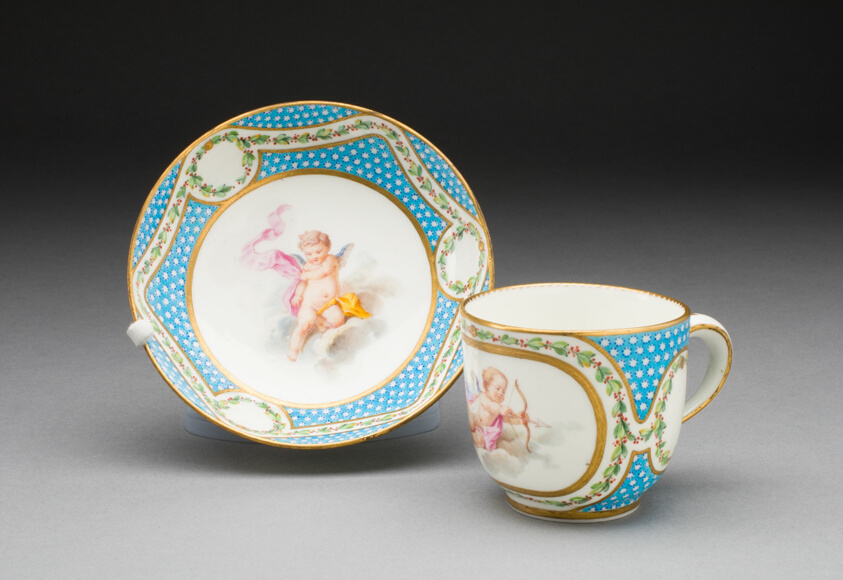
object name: Ceramics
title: Cup and Saucer (from a tea service)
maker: Sèvres Porcelain Manufactory; French, founded 1740; François Boucher (French, 1703-1770); Painted by Jacques Fontaine (French, 1734/35-1807, active 1752-1800)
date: 1770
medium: Soft-paste porcelain, polychrome enamels, and gilding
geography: Sèvres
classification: drinking vessel; teaware; tea service; porcelain; european decorative arts; ceramics